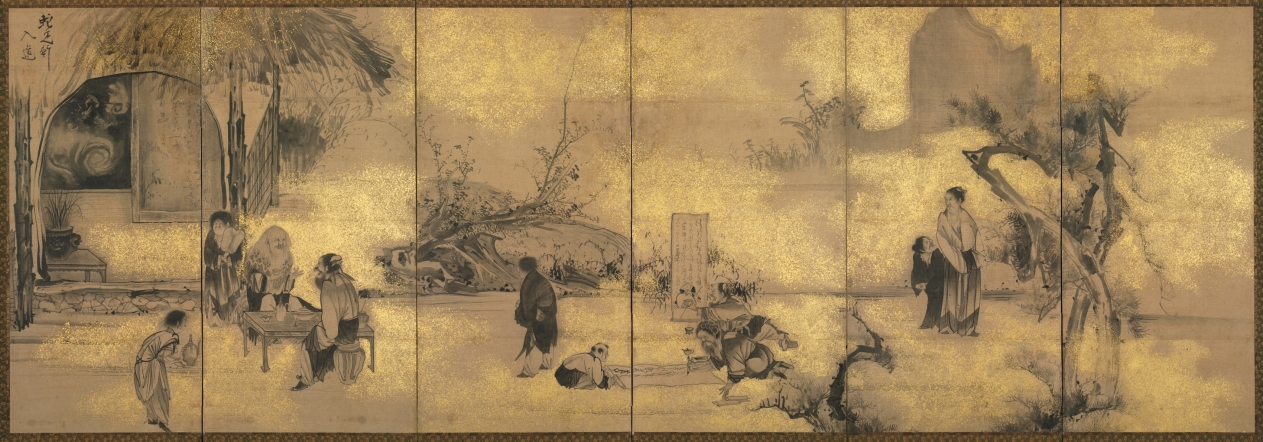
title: The Eight Immortals of the Wine Cup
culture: Japan, Edo period (1615–1868)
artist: Soga Shōhaku (Japanese, 1730–1781)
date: later 1700s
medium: six-panel folding screen, ink and cut-gold foil on paper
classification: Painting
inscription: signature upper left corner.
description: Responding to the desires of the middle class (chonin), some Japanese painters of the late Edo period moved away from the seriousness associated with the Chinese theme of reclusion, focusing instead on the motif’s humorous aspects. The theme Eight Immortals of the Wine Cup is based on a poem by the renowned 8th-century Chinese poet Du Fu about his eight colleagues. These scholars eagerly sought release from their official governmental duties and then supposedly fled the capital for the countryside. There, they engaged in wildly eccentric behavior and adventurous creative work, all fueled by copious amounts of wine. Shohaku’s version of events exaggerates the scholars’ pleasure, as seen in their comical facial expressions.